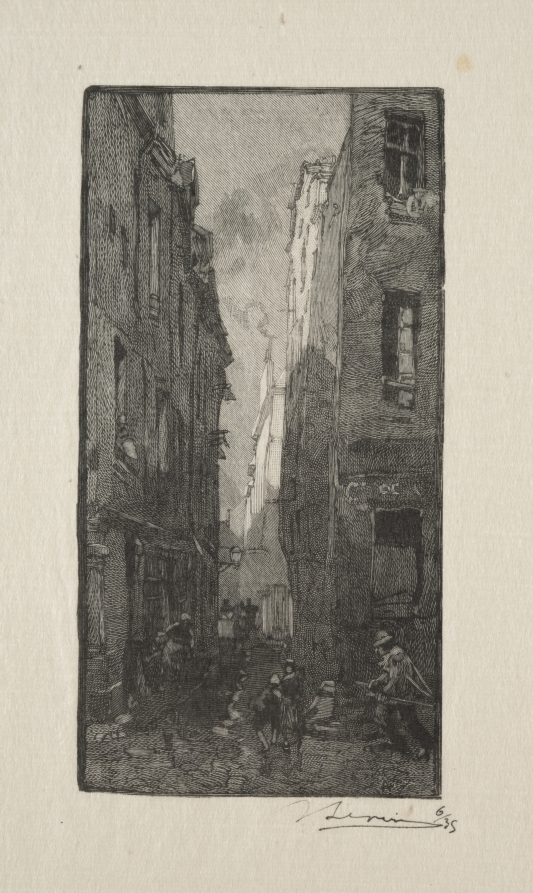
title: La Rue des Cordiers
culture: France, 19th-20th century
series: Demolition of the Sorbonne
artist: Auguste Louis Lepère (French, 1849–1918)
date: 1885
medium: wood engraving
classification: Print